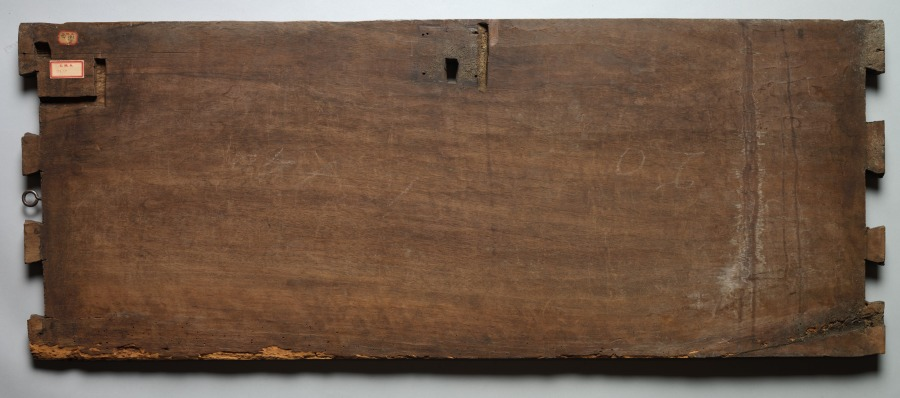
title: Chest Front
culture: India or Syria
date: 1700s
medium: wood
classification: Wood